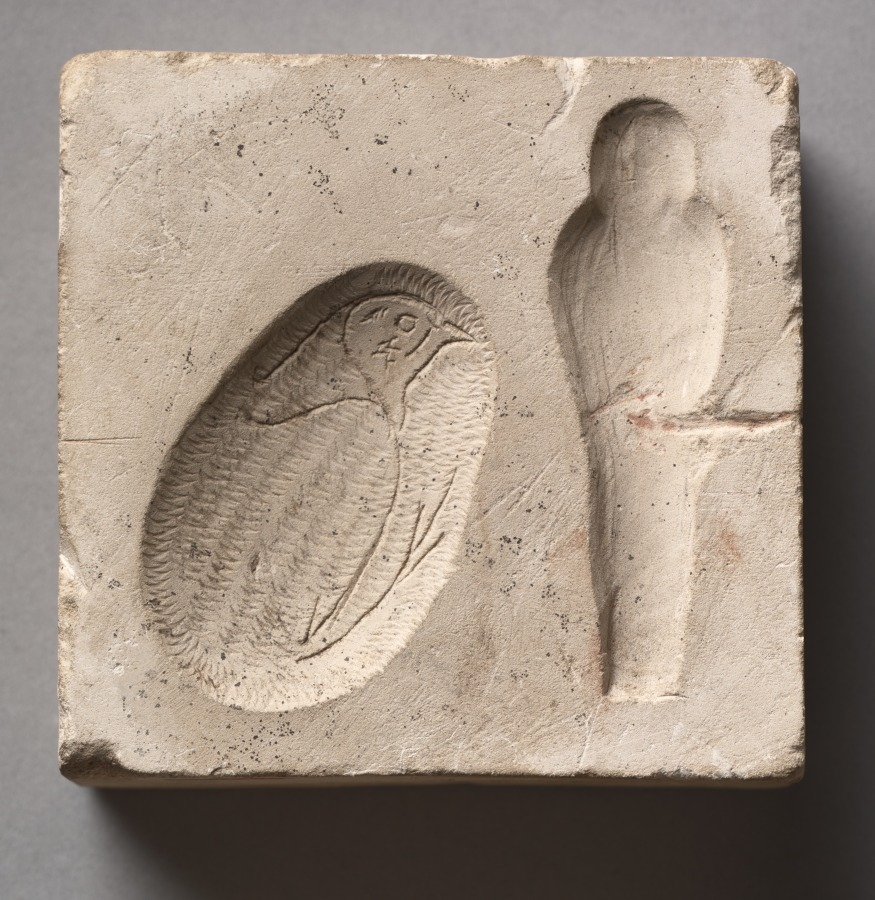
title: Mold in Two Parts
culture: Egypt, Greco-Roman period (332 BCE–395 CE), Ptolemaic dynasty (305–30 BCE) or later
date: 305–30 BCE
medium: limestone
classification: Sculpture